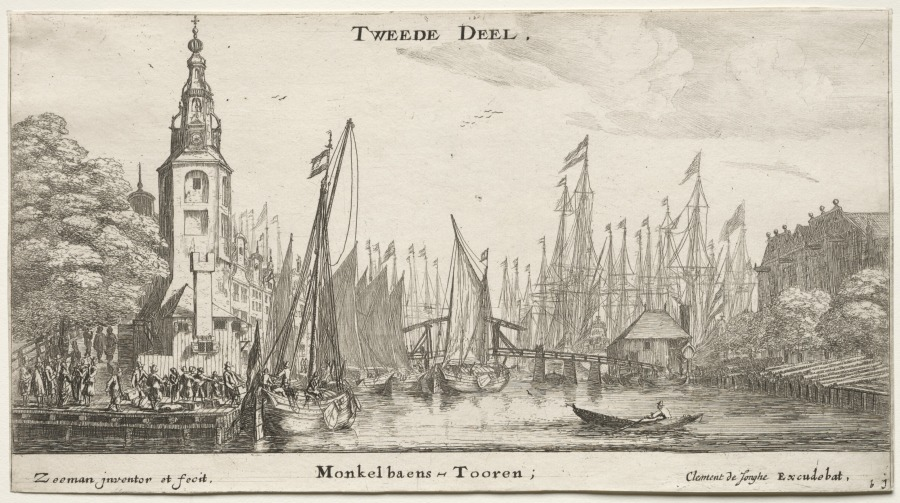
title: Various Ships and Views of Amsterdam (Verscheÿde Schepen en Gesichten van Amstelredam), Part II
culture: Netherlands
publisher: Clement de Jonghe (Dutch, 1579–1679)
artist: Reinier Nooms, called Zeeman (Dutch, c. 1623–1664)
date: 1652–54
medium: etching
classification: Print